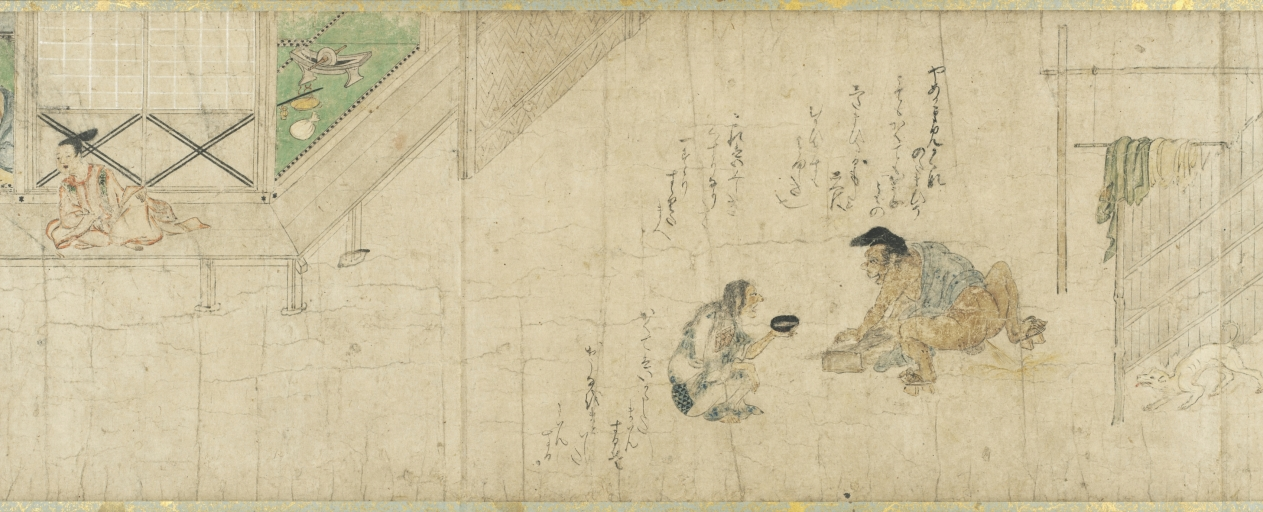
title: The Story of Fukutomi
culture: Japan, Muromachi period (1392–1573)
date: mid-1400s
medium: Handscroll; ink and color on paper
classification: Painting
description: This handscroll shows the second half of an odd tale in which a ne’er-do-well seeks the path to quick fortune and learns the art of musical flatulence. Prior to a major performance, a mentor (and competitor) advises him to consume morning glory seeds, a laxative. Thus, while performing he fouls himself and ends his days in humiliation. The audacious nature of this story and its presentation—well-animated figures with dialogue adjacent to the appropriate moments of action—create a primitive graphic novel. Japanese visual humor about farting preceded this story, but the satirical, mean-spirited twist in this tale suggests its intent was not merely to be humorous. The story was likely commissioned by court officials who disapproved of common performers rising to high positions, outflanking what was the accepted social order.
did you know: This scroll is treasured as the second oldest surviving version of this story.